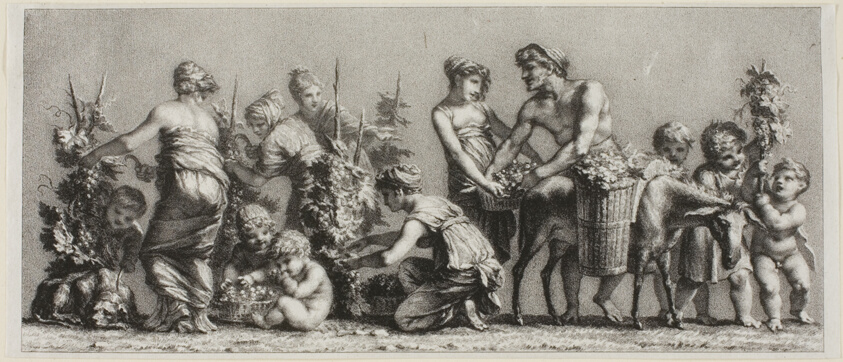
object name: Print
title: Scene of Grape Harvest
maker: Unknown Artist; French, 19th century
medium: Stipple engraving on cream wove paper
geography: France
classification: engraving; print; prints and drawing